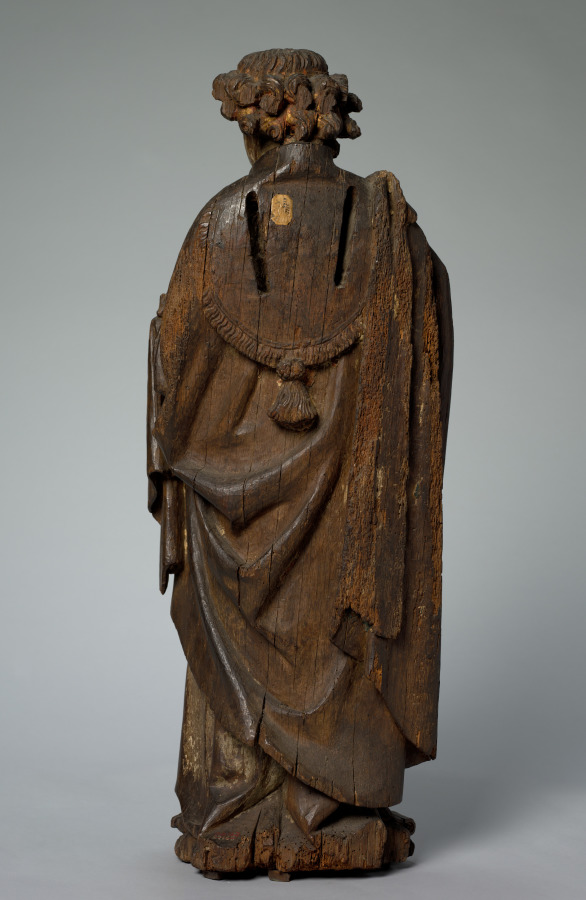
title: Angel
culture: Bruges?, Belgium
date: c. 1430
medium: oak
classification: Sculpture